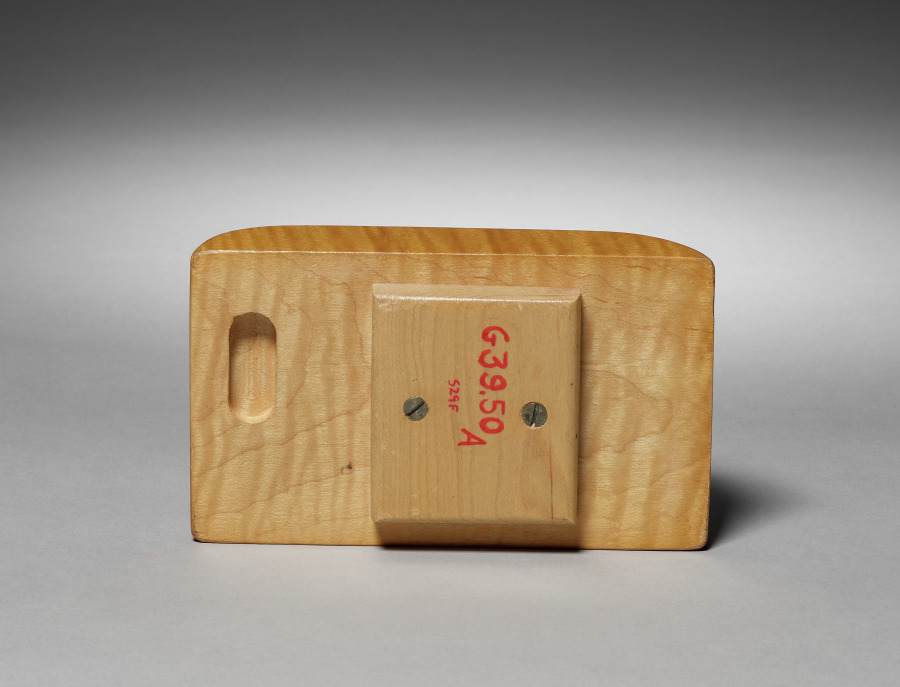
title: Streamline Automobile: Removable Convertible Top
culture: Denmark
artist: Boysen Toys (Danish)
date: 1900s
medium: wood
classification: Wood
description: Credit line: John D. Rockefeller General Education Board Grant II